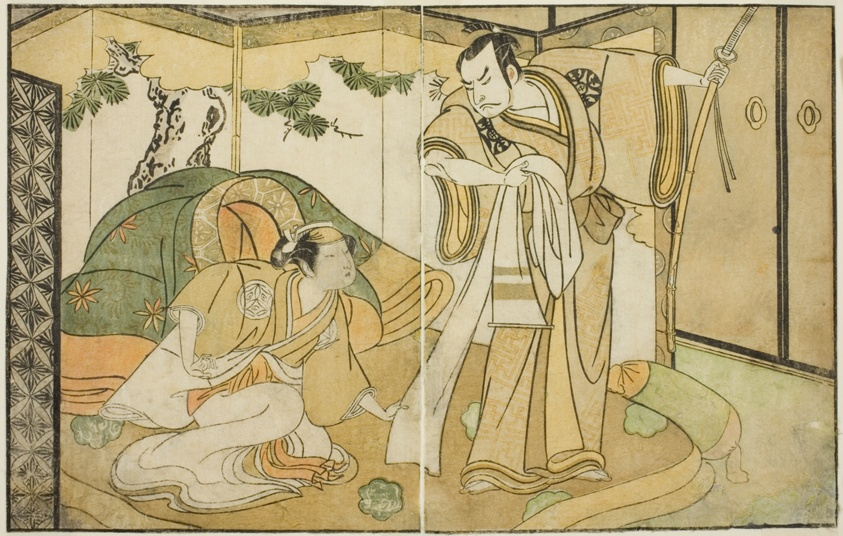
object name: Print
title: The Actors Nakamura Nakazo I as Taira no Kiyomori (right), and Yamashita Kinsaku II as Tokiwa Gozen (left), in the Play Nue no Mori Ichiyo no Mato, Performed at the Nakamura Theater in the Eleventh Month, 1770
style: Japanese (culture or style)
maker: Katsukawa Shunsho 勝川 春章; Japanese, 1726-1792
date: c. 1772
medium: Color woodblock print; from the illustrated book Yakusha Kuni no Hana (Prominent Actors of Japan)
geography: Japan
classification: woodblock print; print; asian art